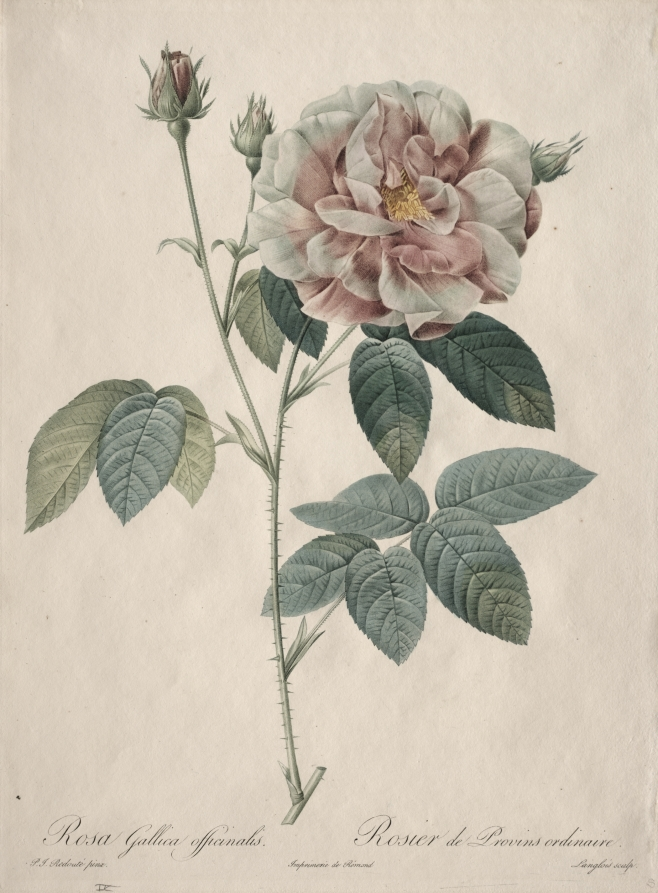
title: Les Roses: Rosa Gallica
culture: France, 19th century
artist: Pierre-Joseph Redouté (French, 1759–1840)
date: 1817–24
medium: stipple and line engraving, with hand coloring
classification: Print